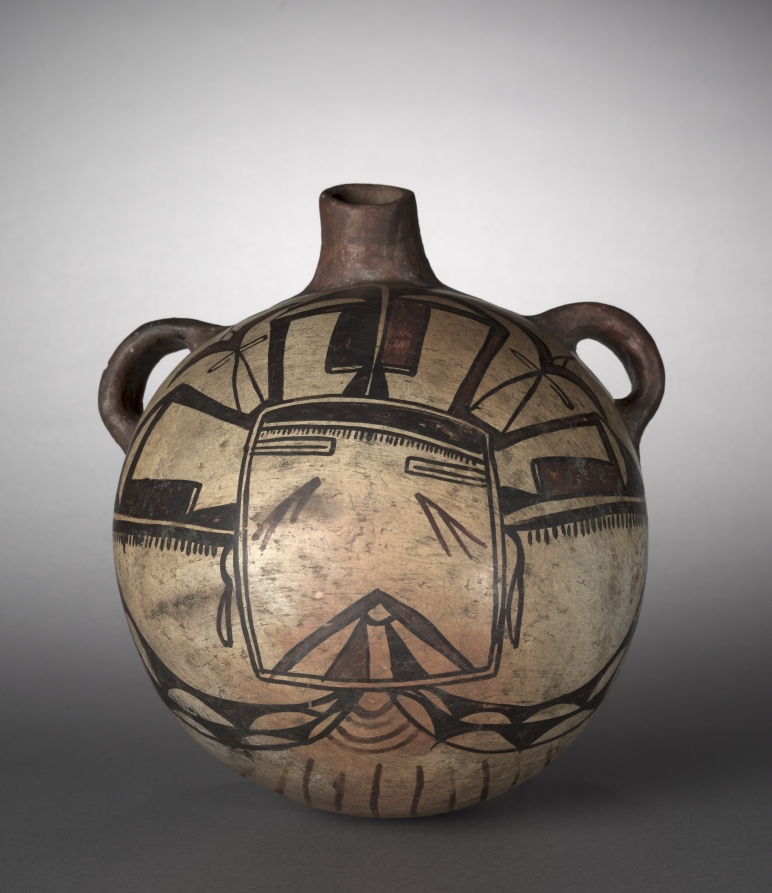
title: Canteen with a Katsina-like Face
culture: Native North America, Southwest, Arizona, Pueblo, Hopi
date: 1890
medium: ceramic, slip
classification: Ceramic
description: Since the 1500s, Hopi women made big-bellied canteens, based on Spanish prototypes, and used them to carry water. By the late 1800s, canteens became popular with Euro-American tourists, who increasingly flocked to the Southwest in search of encounters with “exotic” Native American cultures. Thus, Hopi artists embellished their wares to improve their appeal. This example is painted with a face similar to a Katsina’s, a spirit being central to Pueblo religion—but it is a fanciful rendition, not an actual Katsina. Could the maker have been taking control of her culture and its consumption by outsiders?